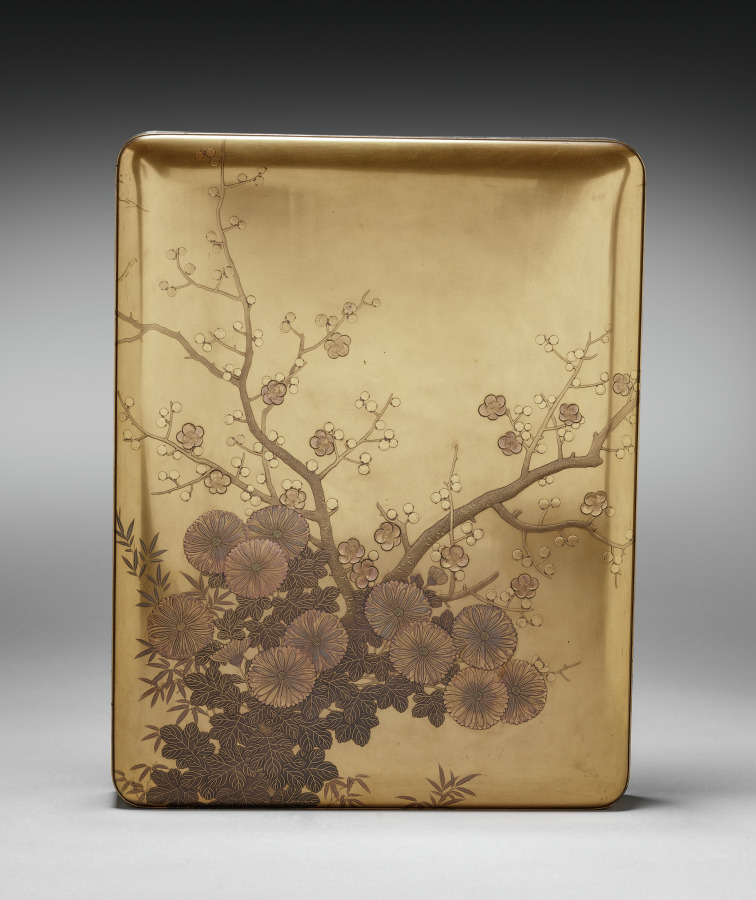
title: Document Box (Ryōshibako) with Chrysanthemum and Plum (lid)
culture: Japan, Meiji period (1868–1912)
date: late 1800s-early 1900s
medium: gold lacquer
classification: Lacquer